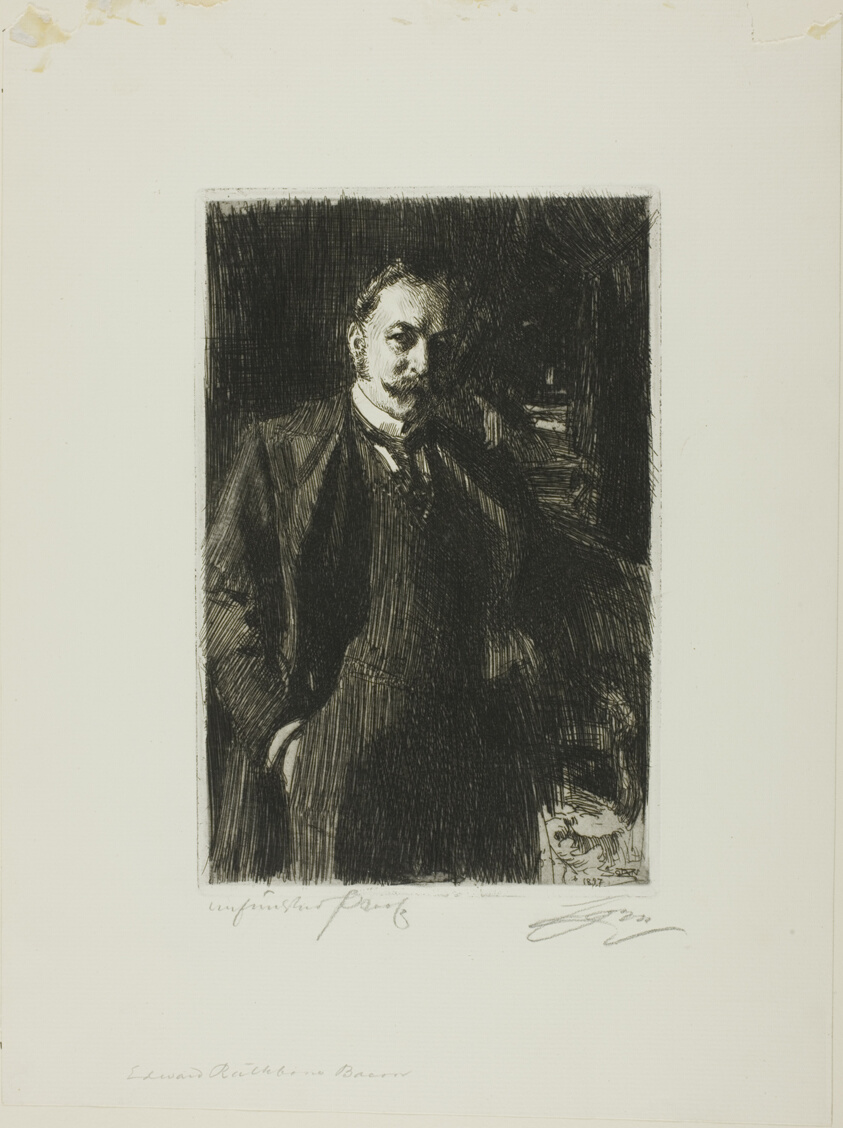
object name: Print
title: E. R. Bacon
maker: Anders Zorn (Swedish, 1860-1920)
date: 1897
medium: Etching on ivory laid paper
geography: Sweden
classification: etching; print; prints and drawing